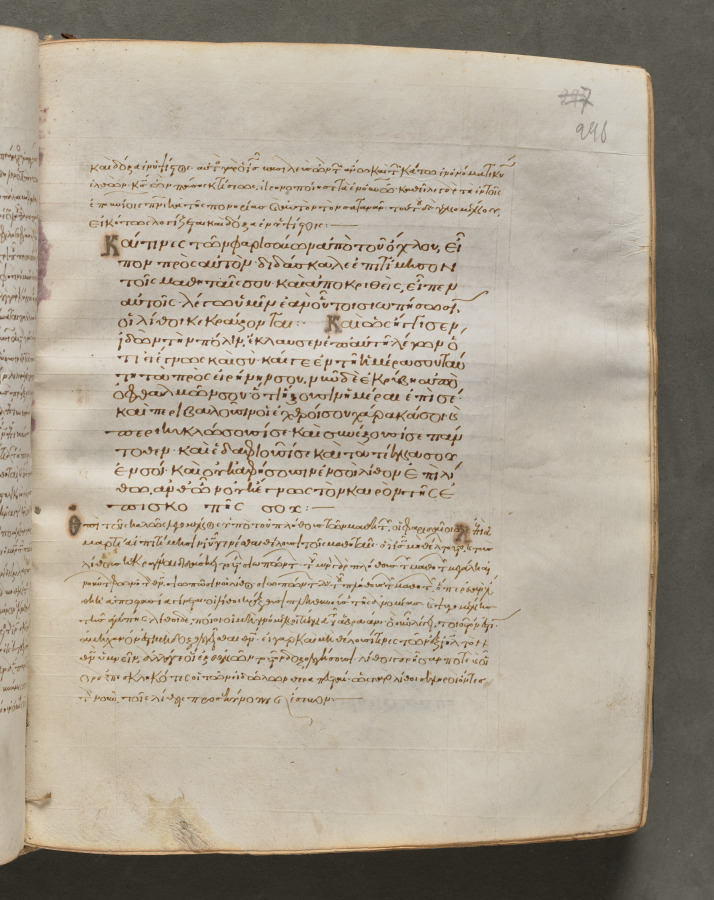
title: Text, folio 298 (recto), from a Gospel Book with Commentaries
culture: Byzantium, Constantinople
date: c. 1000–1100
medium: ink, tempera, and gold on vellum; leather binding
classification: Bound Volume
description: Each of the four gospels in this book opens on a page with brilliantly illuminated borders depicting the author of the text as well as birds—principally peacocks, symbols of the immortality of the soul—and fountains, representing the fountain of life and the salvation of the soul. This volume consists of 428 leaves with texts in Greek. Its level of sophistication suggests that it was probably written and decorated in a monastery in Constantinople.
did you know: Gospel books were carried in procession through Byzantine churches.